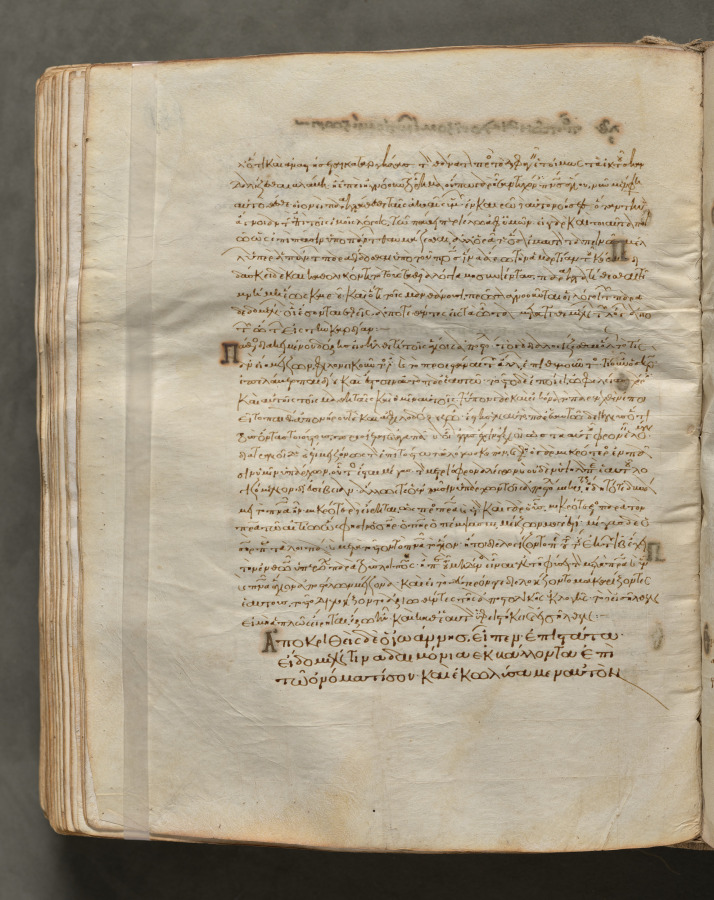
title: Text, folio 250 (verso), from a Gospel Book with Commentaries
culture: Byzantium, Constantinople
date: c. 1000–1100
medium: ink, tempera, and gold on vellum; leather binding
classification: Bound Volume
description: Each of the four gospels in this book opens on a page with brilliantly illuminated borders depicting the author of the text as well as birds—principally peacocks, symbols of the immortality of the soul—and fountains, representing the fountain of life and the salvation of the soul. This volume consists of 428 leaves with texts in Greek. Its level of sophistication suggests that it was probably written and decorated in a monastery in Constantinople.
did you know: Gospel books were carried in procession through Byzantine churches.